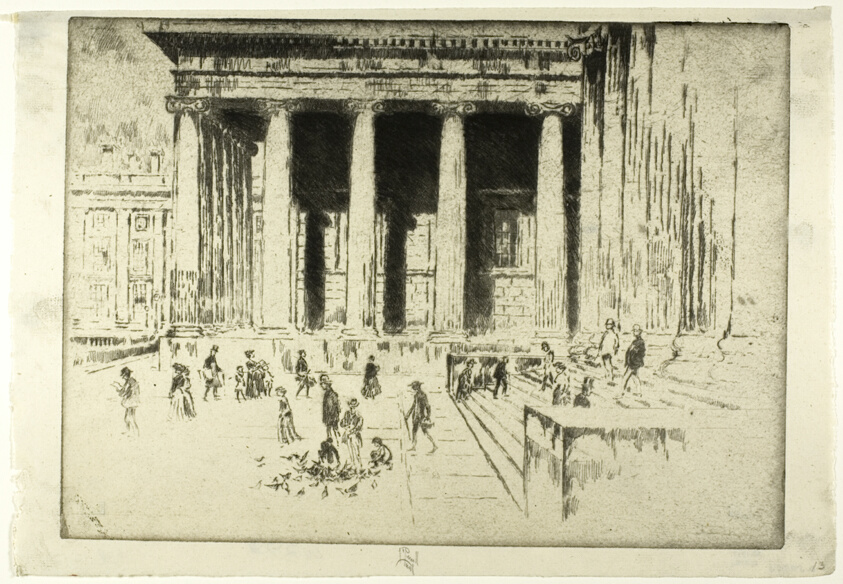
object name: Print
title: The Steps, British Museum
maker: Joseph Pennell (American, 1857-1926)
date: 1904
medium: Etching on ivory wove paper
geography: United States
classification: etching; print; prints and drawing